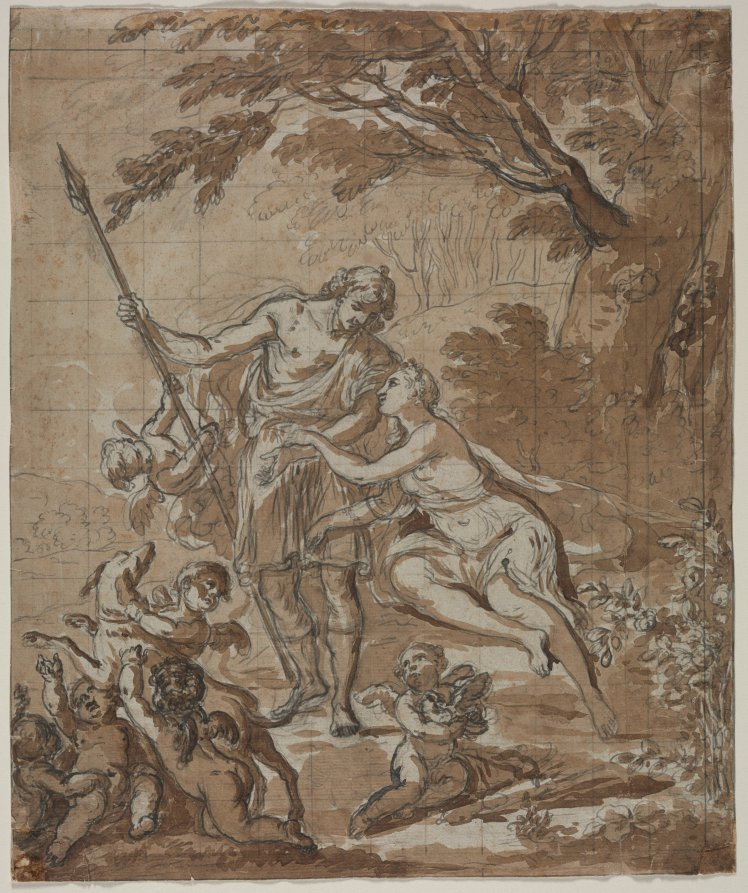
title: Venus and Adonis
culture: France, 18th century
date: 1713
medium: black chalk, pen and gray ink with brown wash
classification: Drawing